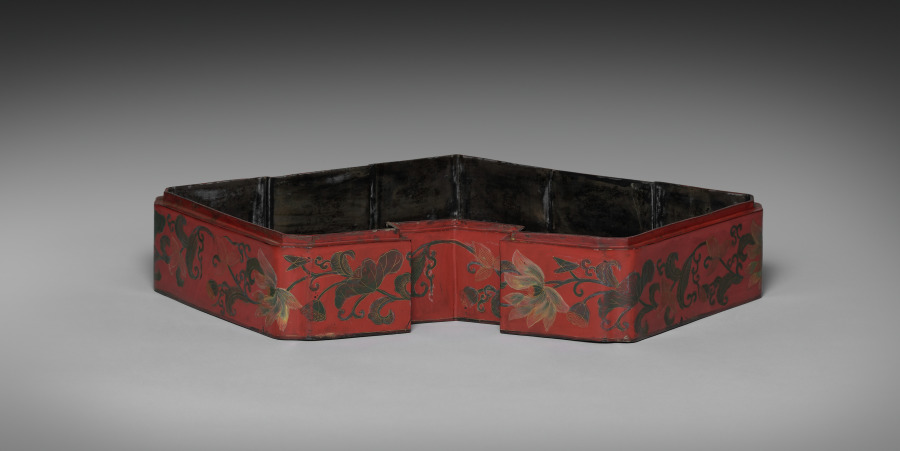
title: Lower Tier Box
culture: Japan, Edo period (1615–1868)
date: late 1700s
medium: red lacquer over a wood core, with litharge painting and engraved gold designs (Ryukyuan)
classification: Lacquer